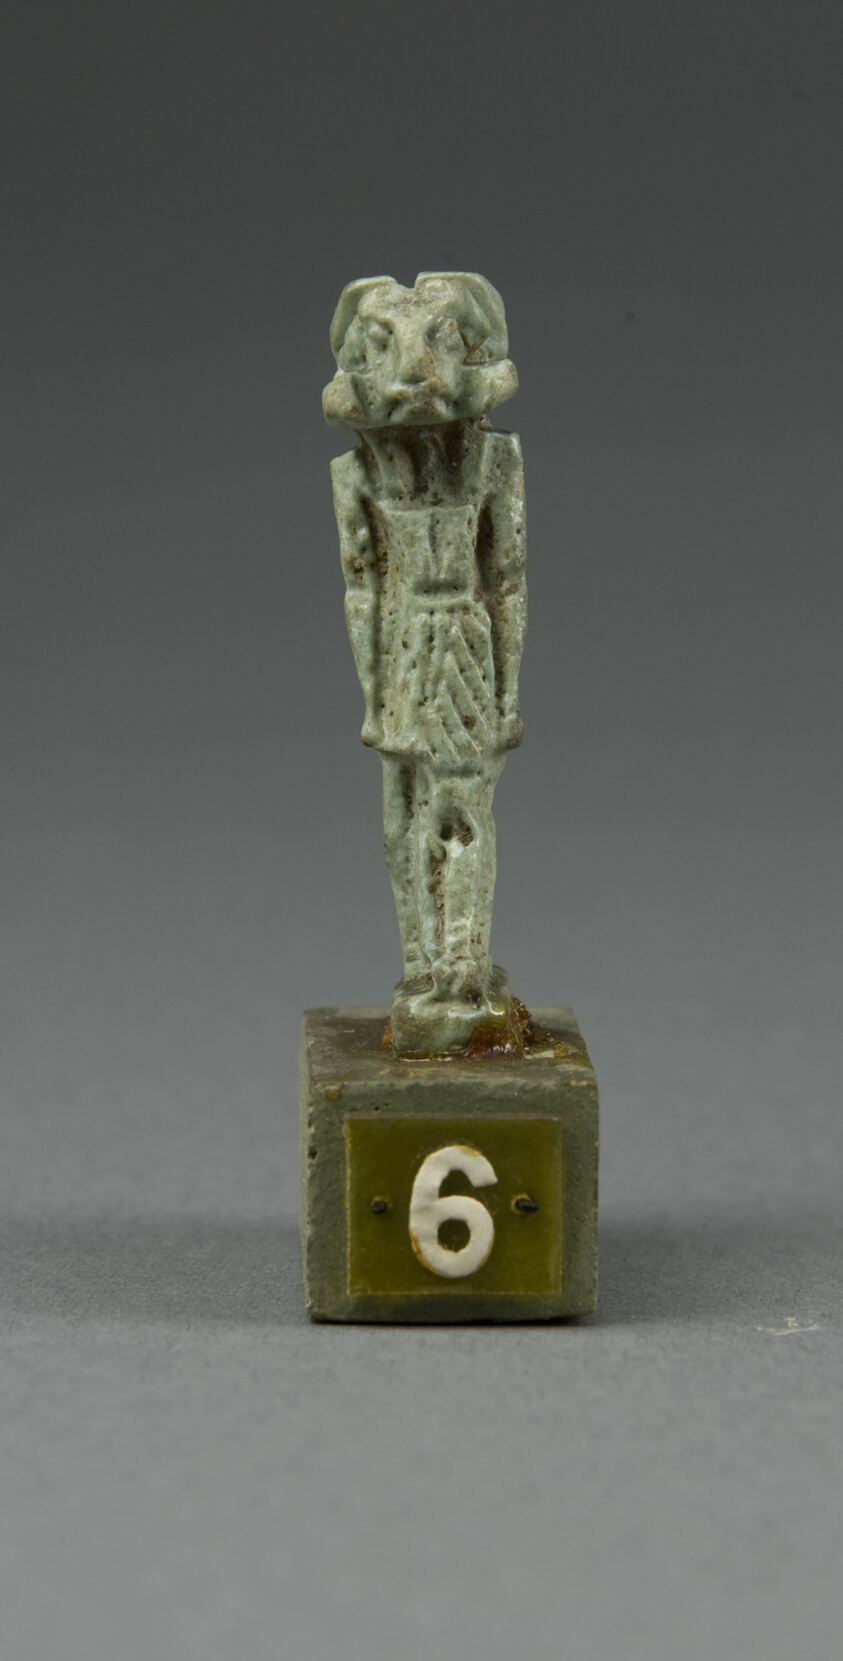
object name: Costume and Accessories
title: Amulet of the God Khnum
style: third intermediate period, egyptian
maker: Egyptian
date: Third Intermediate Period, Dynasty 21–25 (1070–656 BCE)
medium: Faience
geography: Egypt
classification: amulet; jewelry; ceramics; ancient art; costume; faïence (composite material)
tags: gods (deities)